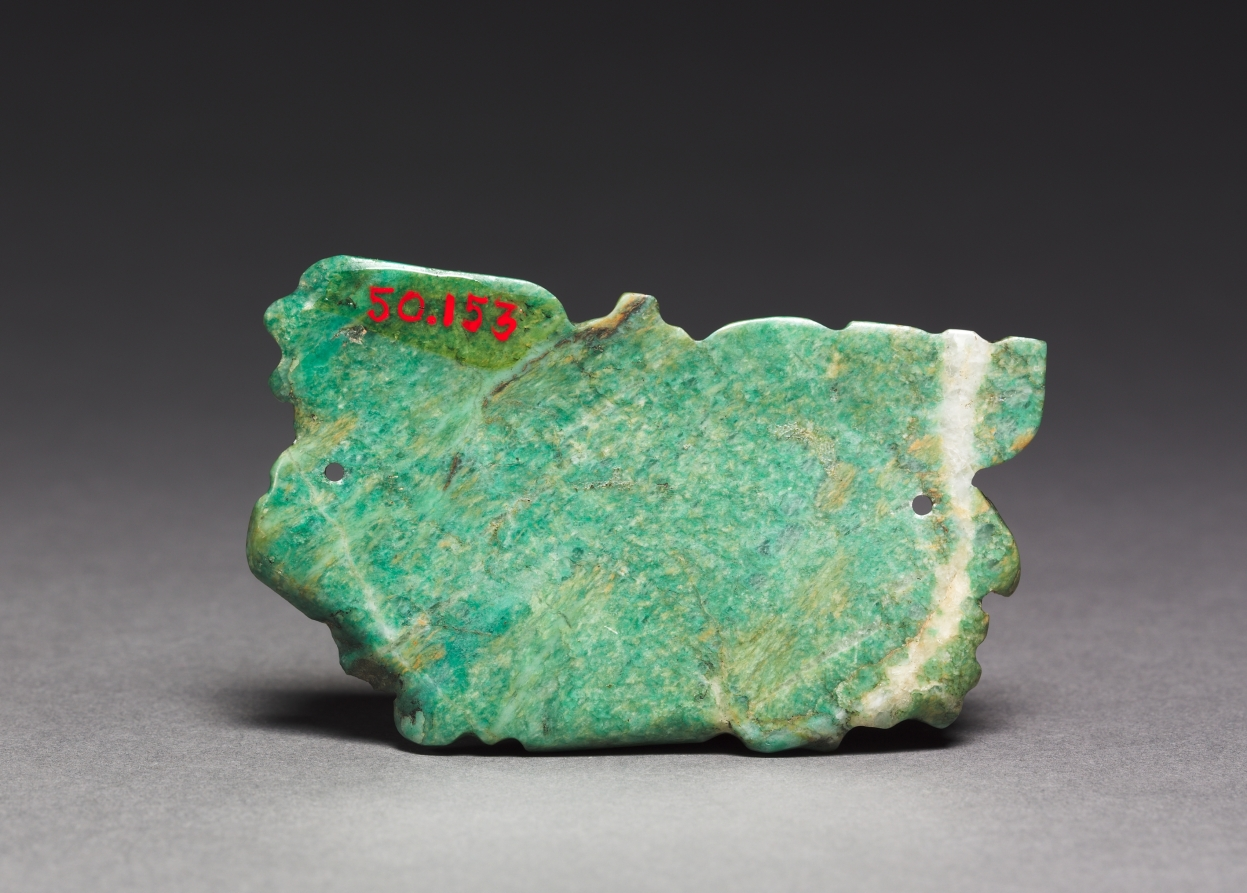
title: Ornament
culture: Mexico or Central America, Maya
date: 250–900 CE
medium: greenstone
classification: Stone